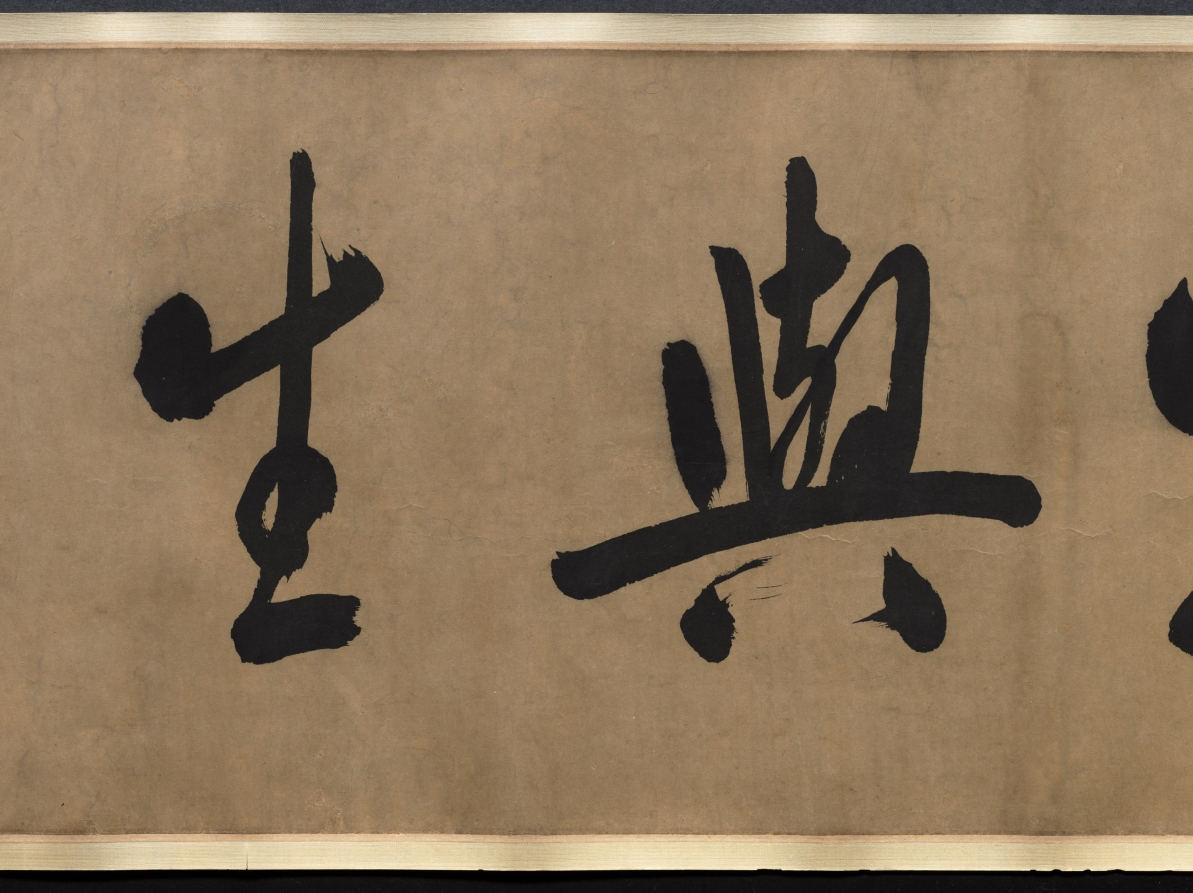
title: Insects and Flowers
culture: China, Qing dynasty (1644-1911) or Republican period (1912-49)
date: c. 1900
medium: Handscroll, ink and color on paper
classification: Painting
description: More than 26 feet long, this scroll presents insects, reptiles, and plants in delicate brushwork and pale colors, referring in style to earlier Southern Song dynasty (1127–1279) bird-and-flower paintings. Upon closer inspection, ants dismember a butterfly and reptiles wait to ambush their prey. An inscription at the end of the painting gives us an idea of its meaning: Attributed to the Qing dynasty scholar Zhang Xigeng (張錫庚, 1801–1861), the inscriber relates the work to an earlier painting by Qian Xuan (錢選, c. 1235–before 1307) and further suggests that the painting may allude to the relentlessness of natural selection. By drawing a parallel to tumultuous episodes in Chinese history, the writer might even hint at the domestic rebellions and the aggression of Western powers against China in his lifetime, particularly the Opium Wars (1839–60).